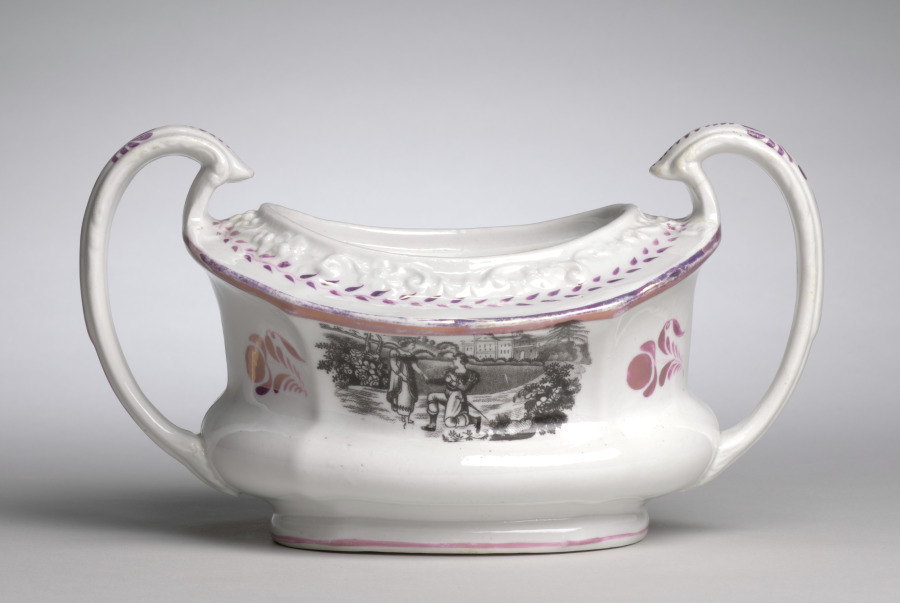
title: Sugar Bowl and Lid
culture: England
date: c. 1800–1825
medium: earthenware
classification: Ceramic